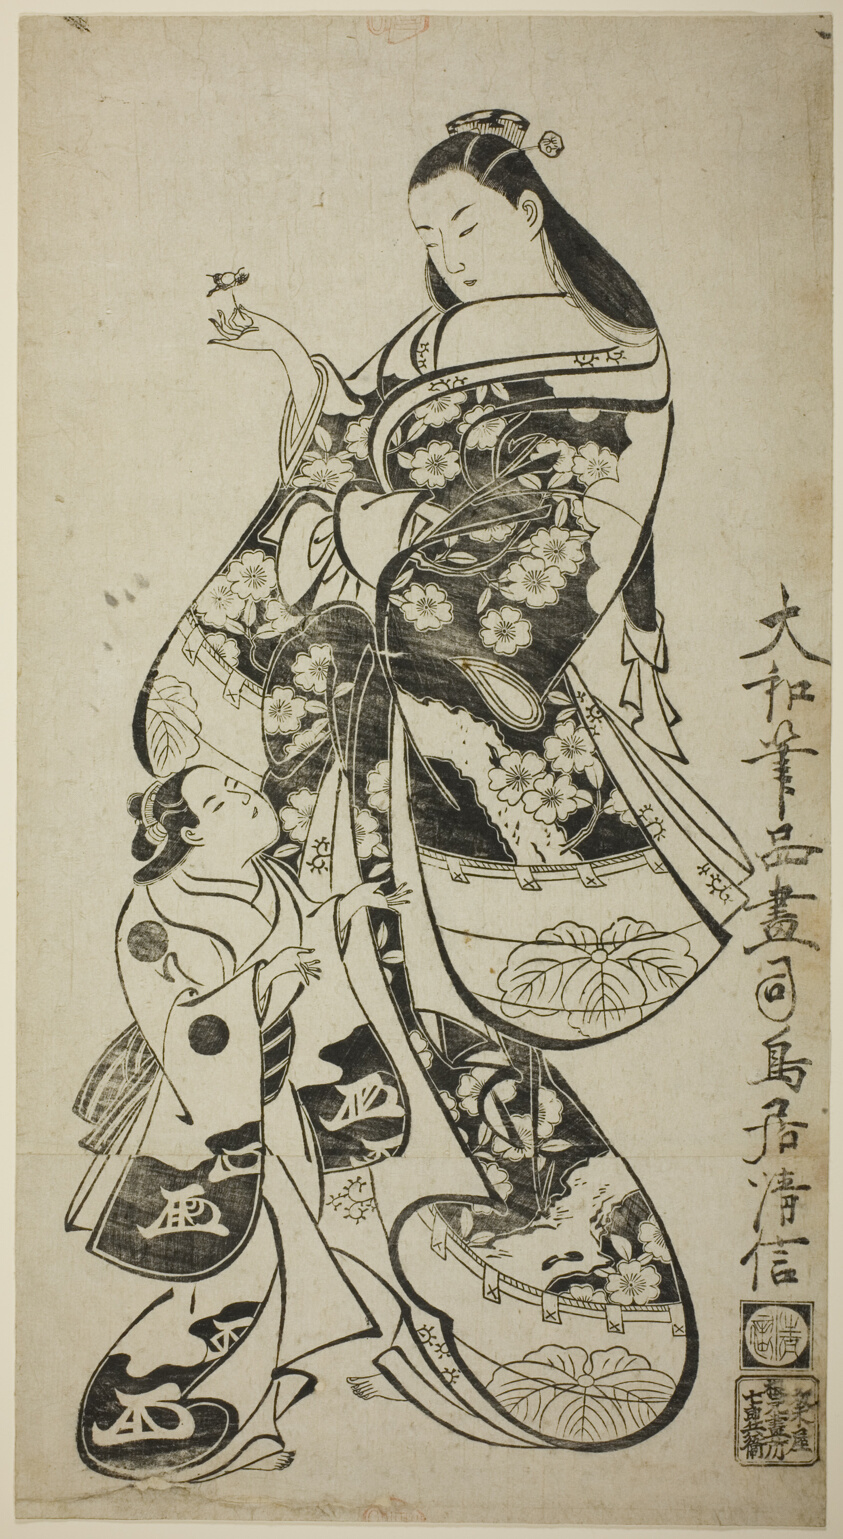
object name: Print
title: A Courtesan with Her Child Attendant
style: Japanese (culture or style)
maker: Torii Kiyonobu I (Japanese, 1664–1729)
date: c. 1715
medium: Woodblock print; o-oban, sumizuri-e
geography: Japan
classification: woodblock print; print; asian art; woodblock